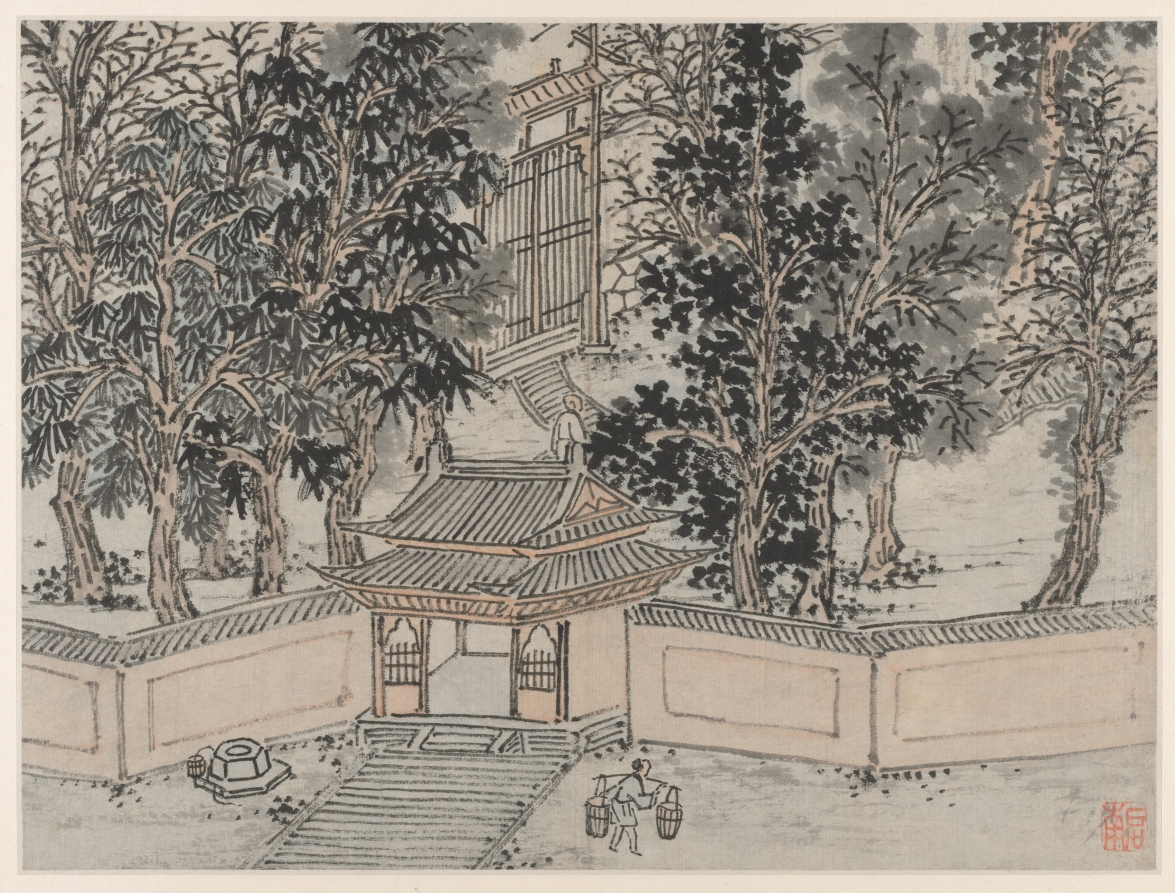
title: Tiger-Flight Spring at the Back Gate, from Twelve Views of Tiger Hill, Suzhou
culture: China, Ming dynasty (1368–1644)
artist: Shen Zhou (Chinese, 1427–1509)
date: after 1490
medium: Album leaf; ink on paper or ink and slight color on paper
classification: Painting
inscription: [印] 启南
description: Views of Tiger Hill depicts a historic site a few miles northwest of Suzhou. The scenes simulate a visit from arriving by boat at the foot of the mountain to climbing to Cloudy Cliff Monastery. Representations of the artist’s mature style, Shen Zhou included views in subtle colors in the suite of monochrome scenes. A Suzhou native, Shen Zhou was supported by family wealth and rejected an official career in favor of life as a retired scholar. Turning to painting in midlife, he is regarded as the founder of the Wu School of painting, with its center in Suzhou.